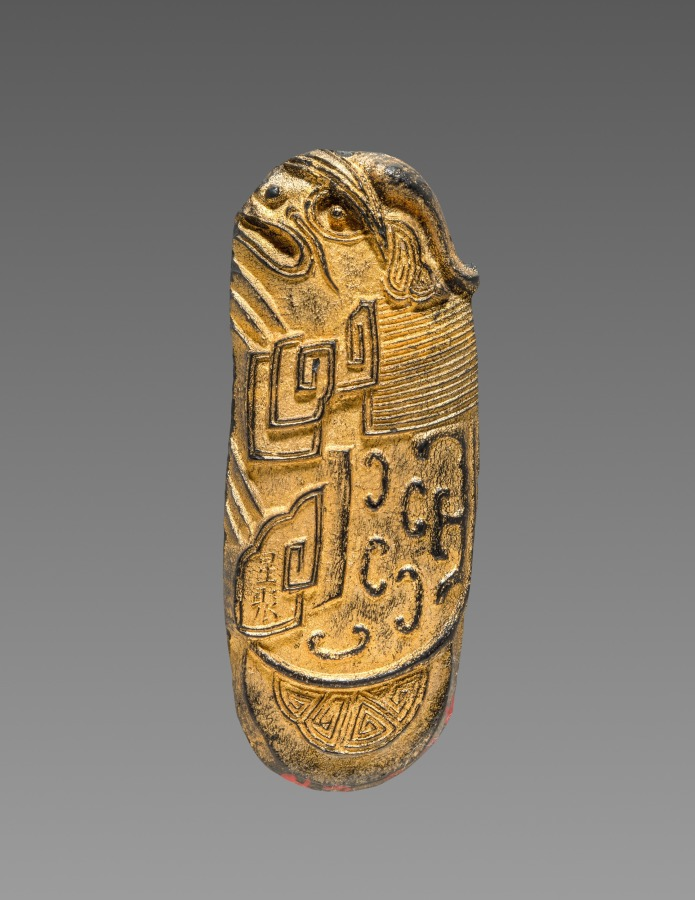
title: Ink Cake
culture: China, Qing dynasty (1644-1911)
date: 19th Century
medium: ink cake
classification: Miscellaneous